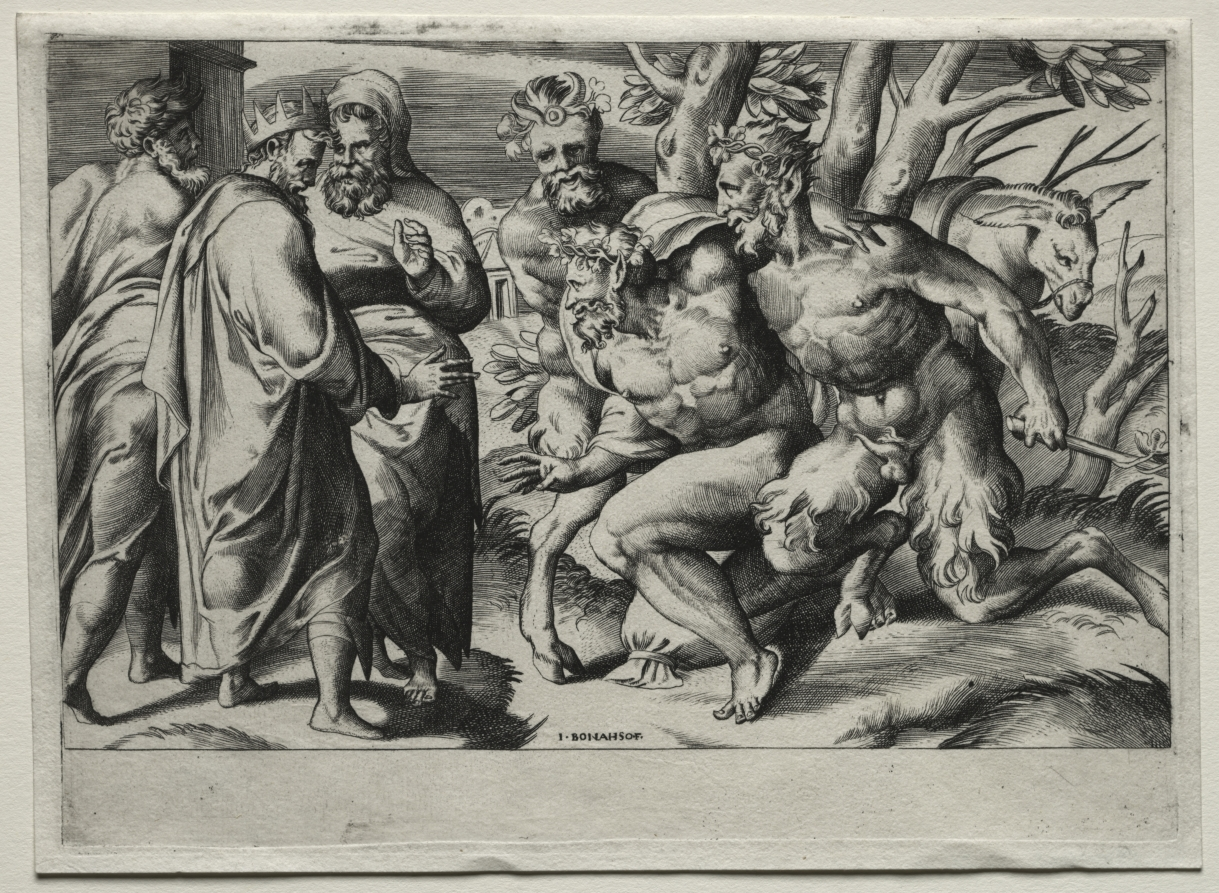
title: Silenus and King Midas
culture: Italy, 16th century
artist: Giulio Bonasone (Italian, c. 1510–after 1576)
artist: after Perino del Vaga (Italian, 1501–1547)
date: mid 16th century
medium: engraving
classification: Print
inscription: lower center, in plate: I. BONASON·F· ; lower left, verso, in graphite: TR146201/1[crossed out] ; TR 14975/1 ; lower right, verso, in graphite: B89 THO BH ; lower right, verso, in graphite: 2050 12/15 [?]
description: In Greek mythology Silenus was an old, drunken satyr (half-man, half-goat), who visited King Midas and was graciously received. In gratitude for Midas's generous hospitality, Dionysus, the god of wine and former pupil of Silenus, granted the king one wish. Midas asked for the power to turn everything that he touched into gold. However, he soon regretted his choice, for he was unable to eat food or drink water, as they also turned to gold. Finally, Dionysus released him from the enchantment.